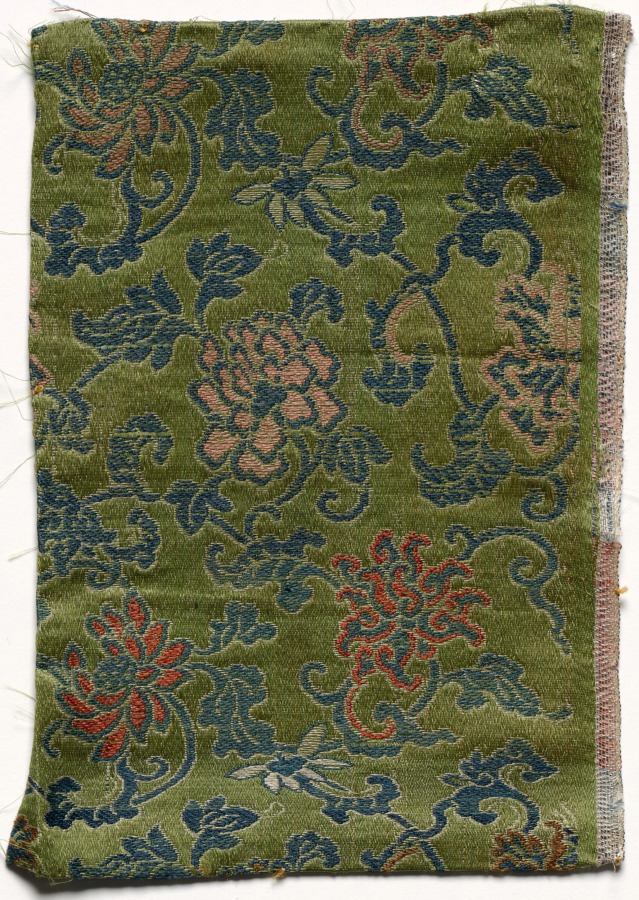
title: Fragment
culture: China, 18th century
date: 1700s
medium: silk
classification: Textile